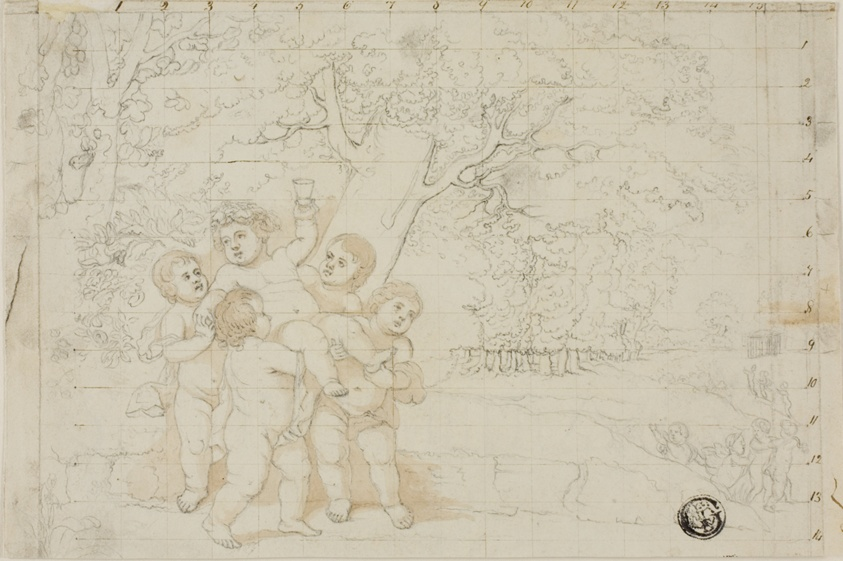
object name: Drawing and Watercolor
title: Putti Carrying Young Bacchus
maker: Unknown Artist; Eurpean, n.d.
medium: Graphite with brush and brown wash, squared in brown ink, on ivory wove paper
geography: England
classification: graphite; pen and ink drawings; drawings (visual works); prints and drawing